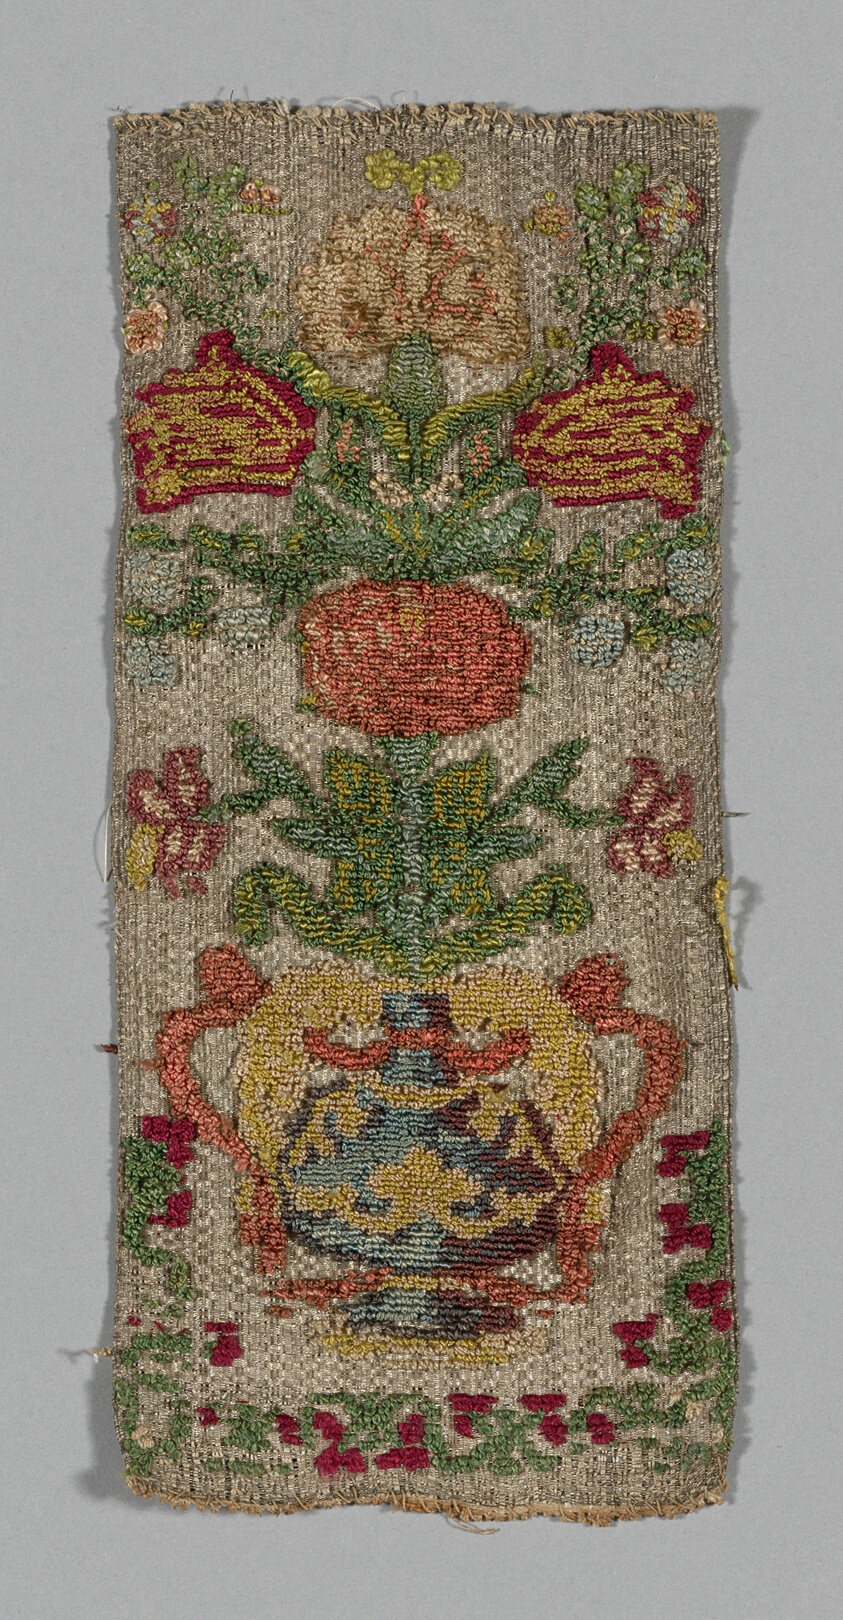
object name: Textile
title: Fragment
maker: Spain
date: 19th century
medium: silk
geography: Spain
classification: textile; weaving